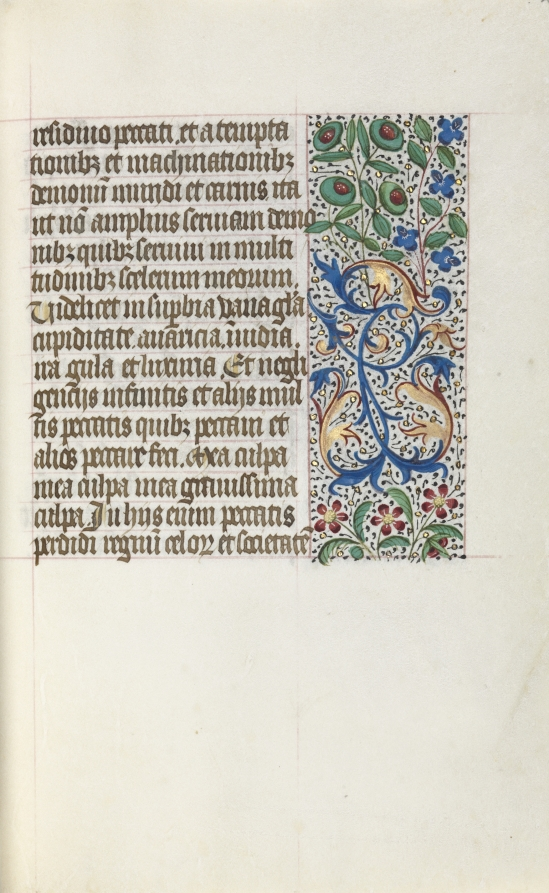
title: Book of Hours (Use of Rouen): fol. 25r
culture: France, Rouen, 15th century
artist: Master of the Geneva Latini (French, active Rouen, 1460–80)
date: c. 1470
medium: ink, tempera, and gold on vellum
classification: Bound Volume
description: In the late 1400s and early 1500s Rouen was an established and important center of book production. The city’s cathedral had a wealthy chapter that spent large sums of money to commission books and to maintain its extensive library. The stationers and booksellers would have likely been concentrated in or near the cathedral precinct. This artist, named after a manuscript now in Geneva, was Rouen’s principal illuminator during the second half of the 1400s.